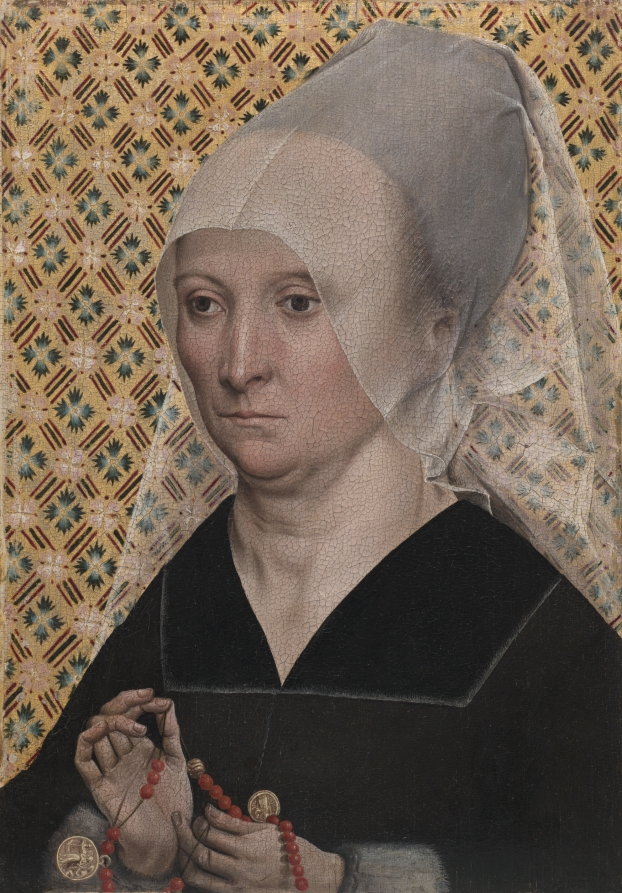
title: Portrait of a Woman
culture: Germany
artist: Master of the Holy Kinship (German)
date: c. 1490–95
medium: oil on wood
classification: Painting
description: This portrait represents a woman in her later middle years holding a rosary made of coral with gold medals. Her identity remains unknown, but the richness and elegance of her black woolen gown with fur-trimmed cuffs and her coif of white sheer linen attest to her comfortable social standing. The prominence of her rosary is perhaps meant to suggest her personal devotion. The panel has been attributed to the anonymous Master of the Holy Kinship the Younger, a painter in Cologne (Germany) with a flourishing workshop in the years around 1500.